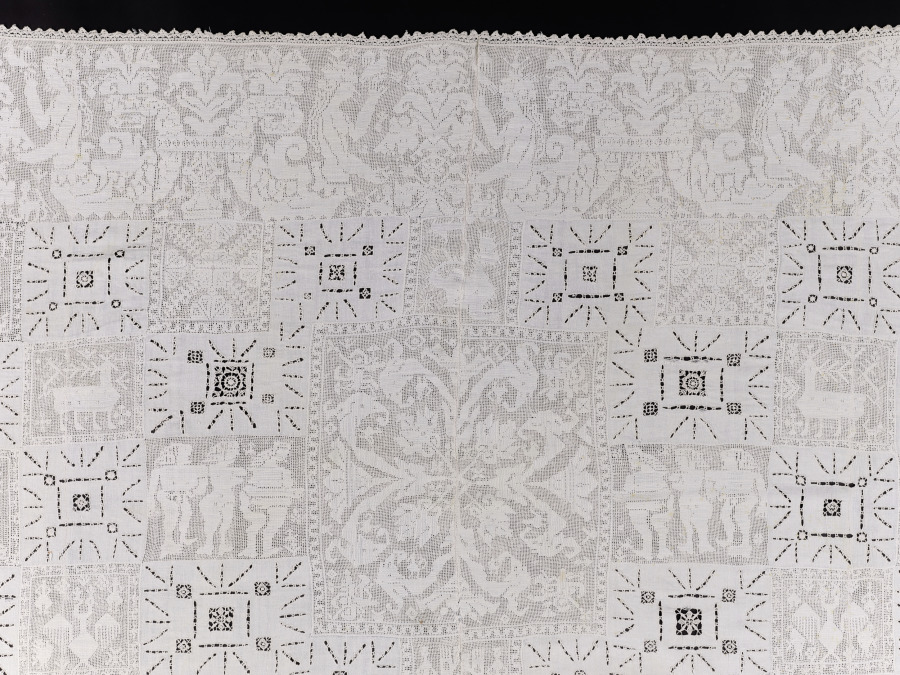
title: Lace Cloth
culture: Italy, 1700s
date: 1700s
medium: Linen: needle lace (cutwork and drawnwork) and bobbin lace edging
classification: Lace